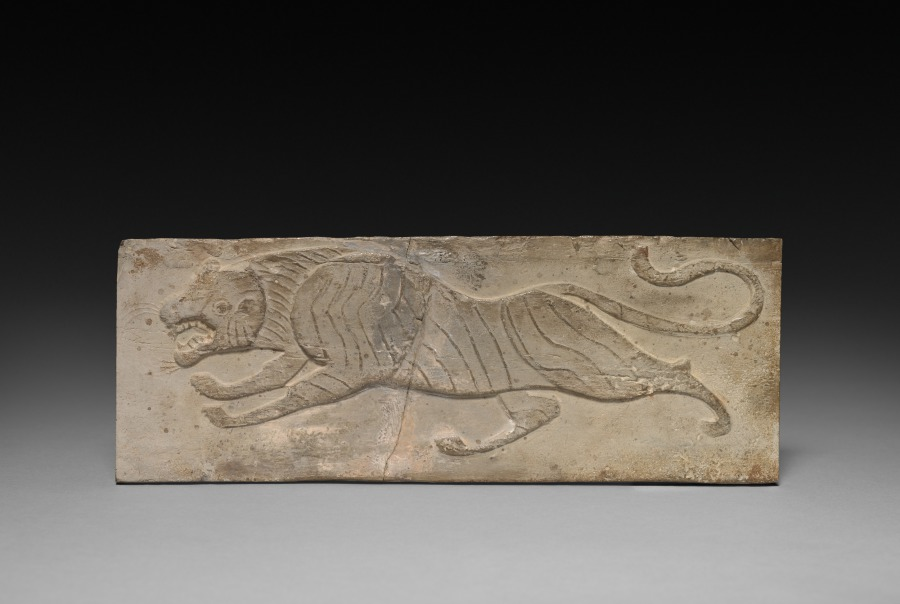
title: Relief with Tiger from a Funerary Stove Model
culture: China, from a tomb in Xi'an, Shaanxi province, Han dynasty (202 BCE–220 CE)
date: 202 BCE–220 CE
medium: earthenware with relief decoration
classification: Ceramic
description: This pottery panel and 1925.137 were made in molds to be joined with other panels to build a miniature stove. The panels, however, are not complete and presumably do not belong together. This panel depicts a tiger protecting the west.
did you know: Han dynasty tombs were often furnished with grave goods to provide the deceased with items for the afterlife.